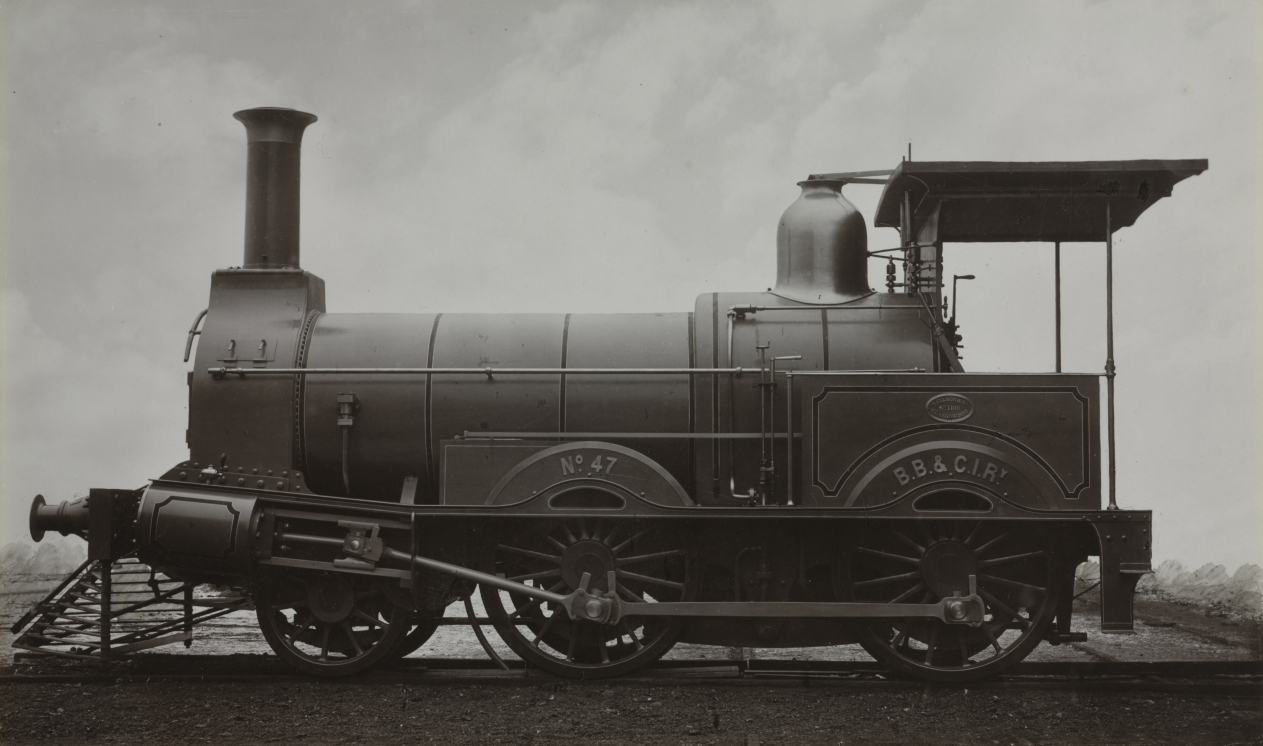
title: Locomotive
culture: England, 19th century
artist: John Stuart (British, 1831–1907)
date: c. 1880s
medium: albumen print from wet collodion negative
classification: Photograph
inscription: Written in pencil on verso: "H626"; "N.E. 284"